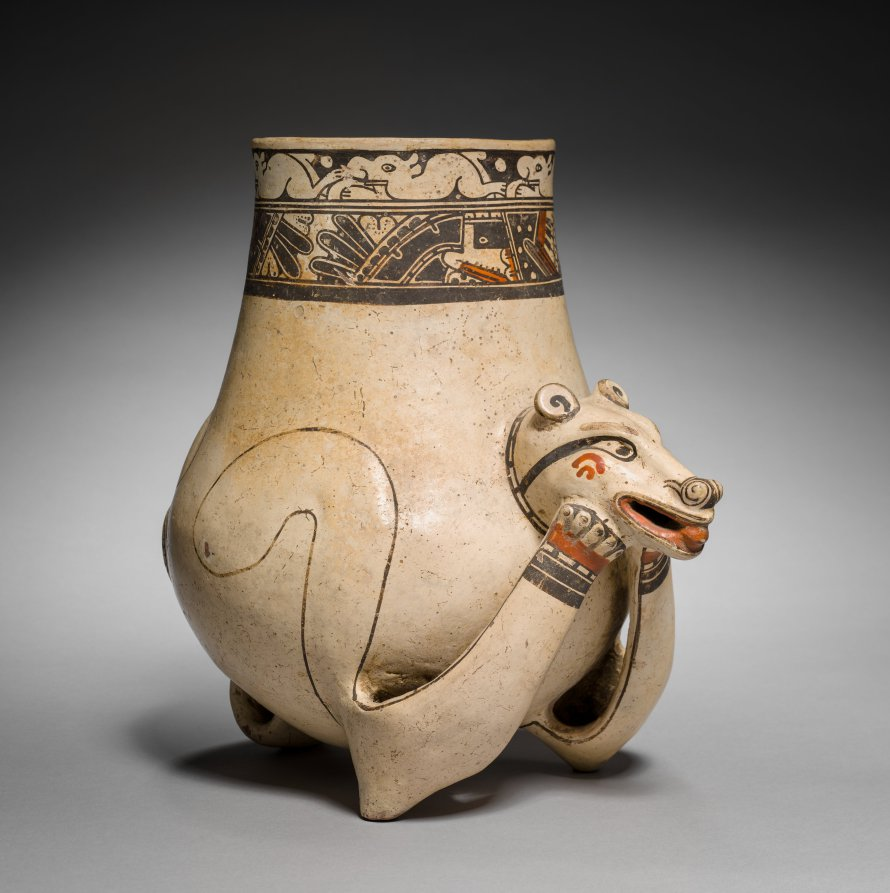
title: Animal Effigy Vessel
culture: Costa Rica, Southern Nicoya region, Pataky Polychrome style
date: 1000–1550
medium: earthenware with colored slips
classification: Ceramic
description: The Pataky style excells in animal portrayals that combine a modeled head with a flat vessel chamber that doubles as the animal’s body. It may be important that many of these animals strike human poses; creatures that combine the human and animal often have mythic import.